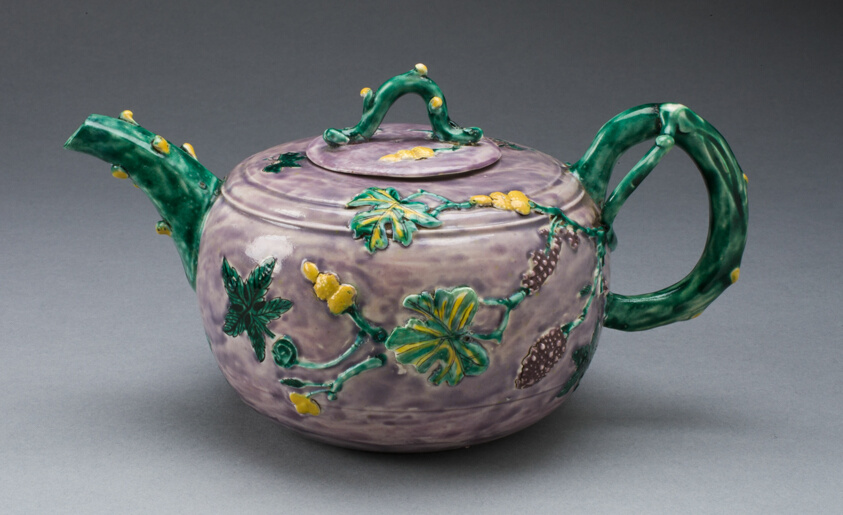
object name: Ceramics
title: Teapot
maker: Staffordshire, England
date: c. 1750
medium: Salt-glazed stoneware, polychrome enamels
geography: Staffordshire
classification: teapot; european decorative arts; ceramics; stoneware; salt-glazed stoneware